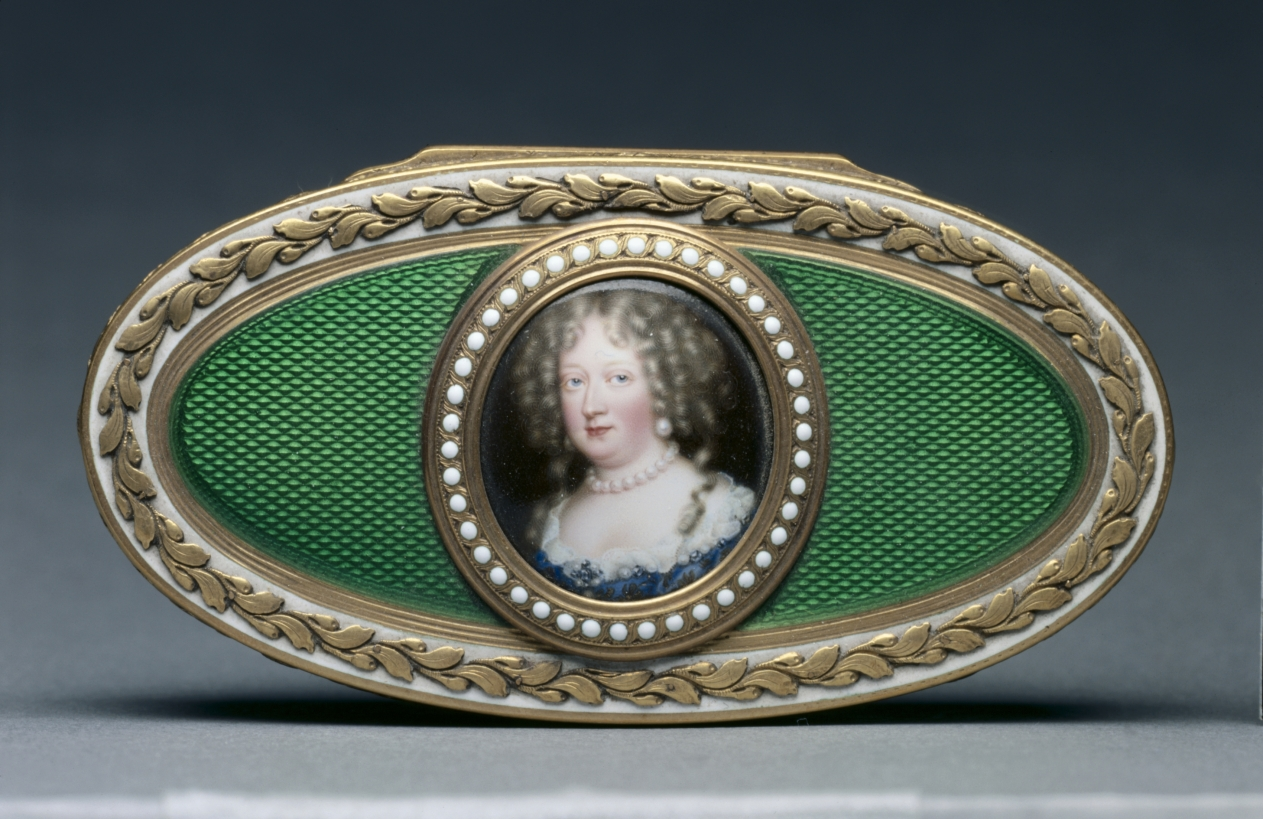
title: Snuff Box (Tabatière) with Portrait of Marie-Thérèse of Austria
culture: France, 18th century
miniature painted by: Jean Petitot (Swiss, 1607–1691)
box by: Charles Le Bastier (French)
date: miniature, c. 1676; box, 1775–76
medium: Gold, enamel, and miniature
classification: Enamel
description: In 18th-century France, ornately enameled boxes that held snuff—powdered tobacco—became a popular accessory in the French court. This box is decorated with a miniature portrait of Marie-Thérèse of Austria, the queen consort of French King Louis XIV. Their union was largely political. A year into their marriage Louis XIV took an official mistress, Madame Pompadour.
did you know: This box resulted from the combined efforts of the popular portrait painter who served the court of French King Louis XIV, Jean Petitot, and master goldsmith Charles Le Bastier.